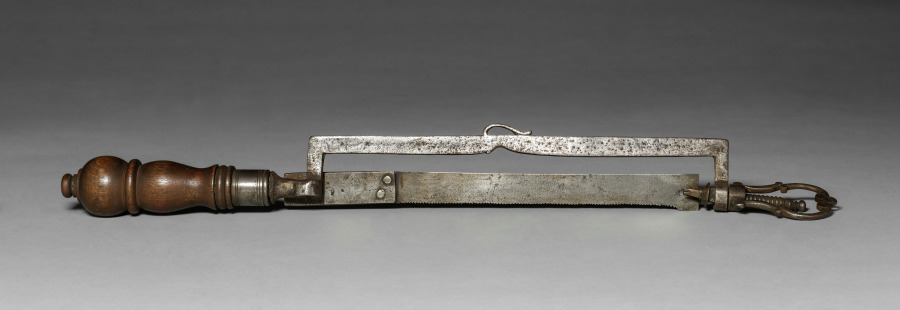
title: Hacksaw with Blade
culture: Europe, 18th century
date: 1700s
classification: Tool